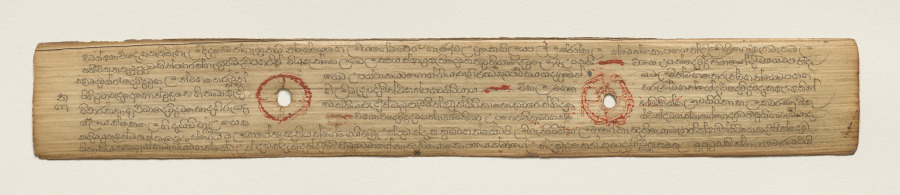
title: Leaf from a Buddhist Manuscript (recto)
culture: Sri Lanka, Singhalese, Late 17th century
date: c. 1700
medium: fiber paper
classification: Manuscript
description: Palm leaf material is still used for manuscripts in Sri Lanka. The palm leaves are prepared first by boiling them, drying them in the sun, and then rubbing them with oils. Scribes then use a metal stylus to incise the text. Then charcoal powder is wiped across the pages, filling in only the inscribed lines.